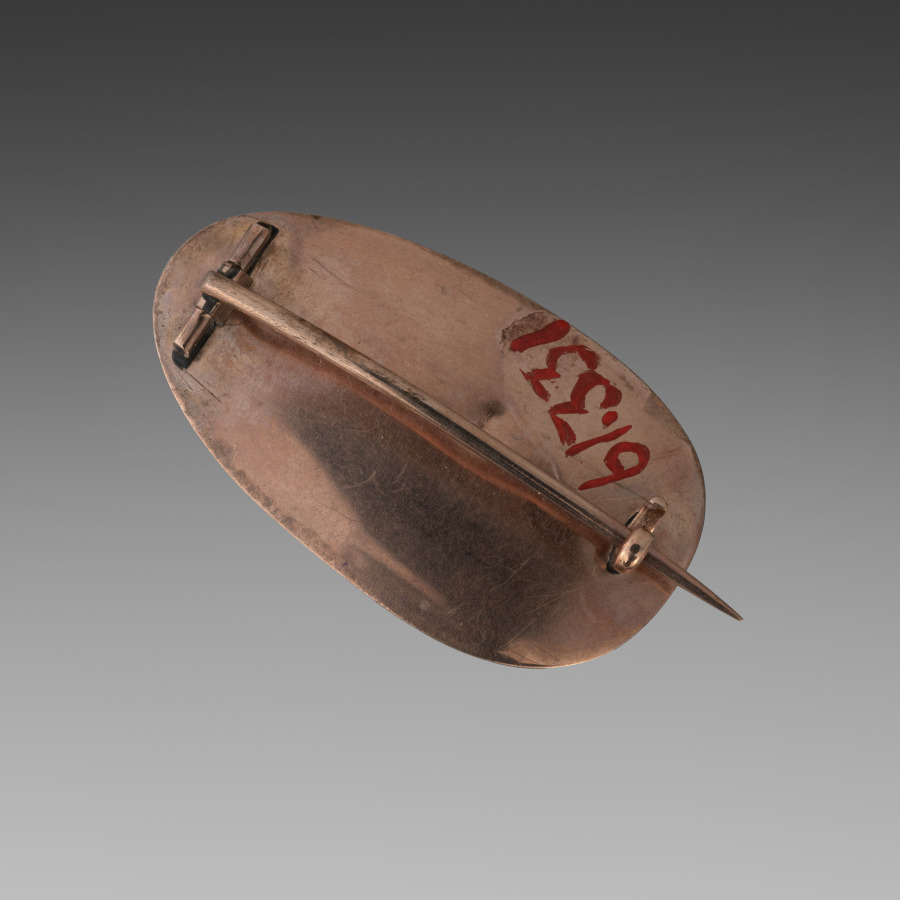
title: Eye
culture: America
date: 1900s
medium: watercolor on ivory set in an acorn-form brooch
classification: Portrait Miniature